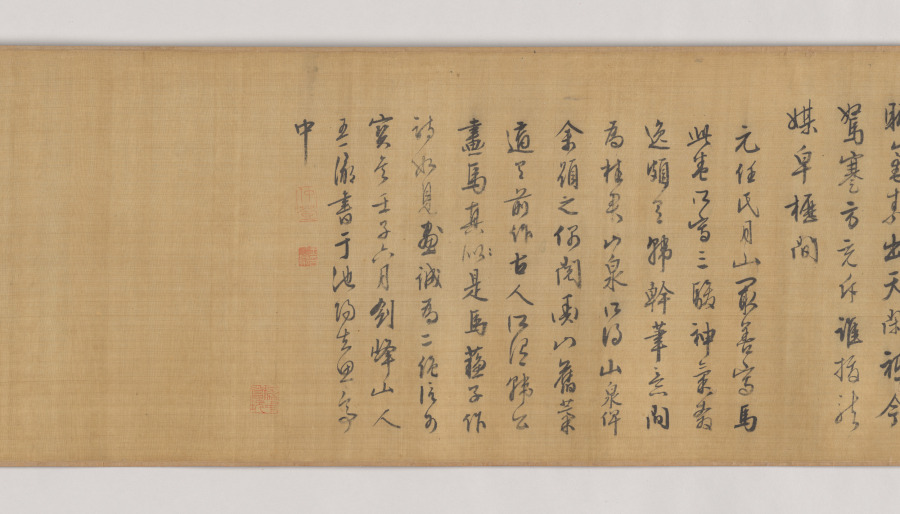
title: Three Horses and Four Grooms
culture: China, Yuan dynasty (1271-1368)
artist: Ren Renfa (Chinese, 1254–1328)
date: c. 1320s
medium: handscroll, ink and color on silk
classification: Painting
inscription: 月山道人. [印] 任氏子明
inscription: 1 colophon and 16 additional seals: 1 poem, 1 colophon dated 1552 or 1612, and 3 seals of Wang Yiying 王一瀛 (1500s); 2 seals of Liang Qingbiao 梁清標 (1620-1691); 6 seals of the Qianlong 乾隆 Emperor (r. 1736-95); 3 seals of the Jiaqing 嘉慶 Emperor (r. 1796-1821); 1 seal of the Xuantong 宣統 Emperor (r. 1908-12); 1 seal of Yu Xiezhong 余協中 (1900s).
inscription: Poem and colophon by Wang Yiying 王一瀛 (1500s): As for painters of horses in the previous dynasty, Surely the name of Yueshan [Ren Renfa] must come first. Under his brush and on his silk, They seem to have just galloped out from the imperial stud. Now as the world overflows with inferiority, Who, from the stable, can recognize a dragon-horse amidst mediocrity. Ren Yueshan [Ren Renfa] of the Yuan Dynasty was best in horse paintings. The three fine steeds he painted in this scroll are so dashing, so vigorous in spirit that they have indeed grasped some of the "brush-idea" of Han Gan. Not long ago this painting came into the possession of Mr. Gui Shanquan, who asked for my inscription. And I, while reading the old manuscripts of Hengshan [Wen Zhengming, 1470-1559], by accident, came cross the poem quoted above. As the ancients said "in painting horses, Master Han was [inspired by and produced] real horses; in composing poems, Master Su [Su Dongpo, the leading Song poet] wrote as if a painting were before him." These are truly what should be considered the two excellences; indeed, they are to be treasured. In the sixth month of the renzi year [either 1552 or 1612]. Jian feng shan ren [The Mountain Dweller of the Sword Peak], Wang Yiying, written in the Qu si ting Pavilion at Chiyang.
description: Ren Renfa's horse images are elegant in appearance and vigorous in spirit. His work attracted not only Chinese scholars but also the Mongols at the imperial court. Inspired by the contemporary scholarly interest in restoring a sense of antiquity in art—an artistic direction led by Zhao Mengfu that exerted a great impact in the Yuan art scene—Ren Renfa, like Zhao Mengfu, modeled his depictions of horses after the Song master Li Gonglin. Another key style component that Ren introduced to this genre was a revival of the Tang classical tradition. The refined color treatment of the horses as seen here was derived from the Tang master Han Gan.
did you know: Only the elegant first horse with a white blaze is accompanied by two grooms, as if its lightning speed required extra supervision.